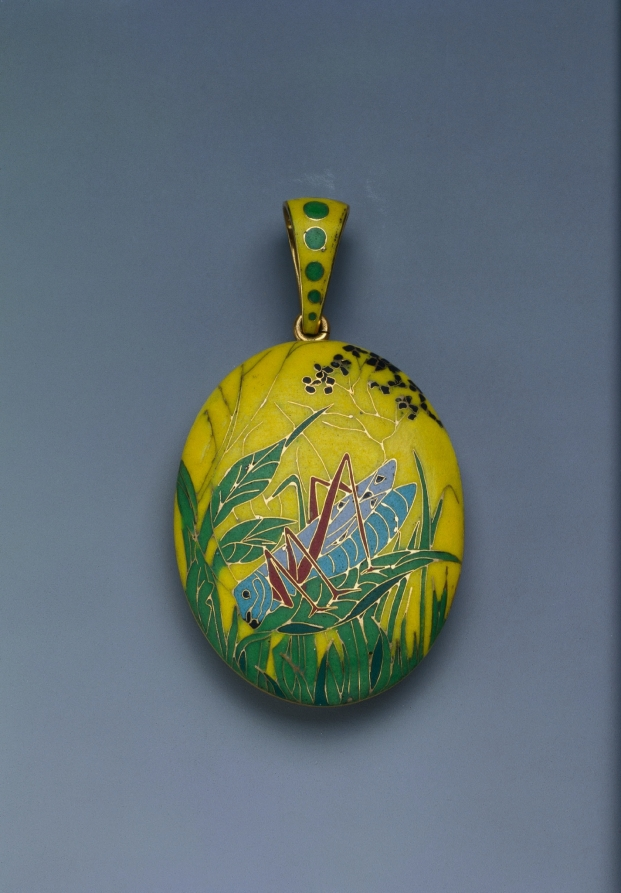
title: Locket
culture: France, 19th century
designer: Alexis Falize (French, 1811–1898)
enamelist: Antoine Tard (French, active 1860–1889)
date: 1868–70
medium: gold and cloisonné enamel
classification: Jewelry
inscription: inscribed inside original box: Tiffany + Co./550-Broadway-552/New York."